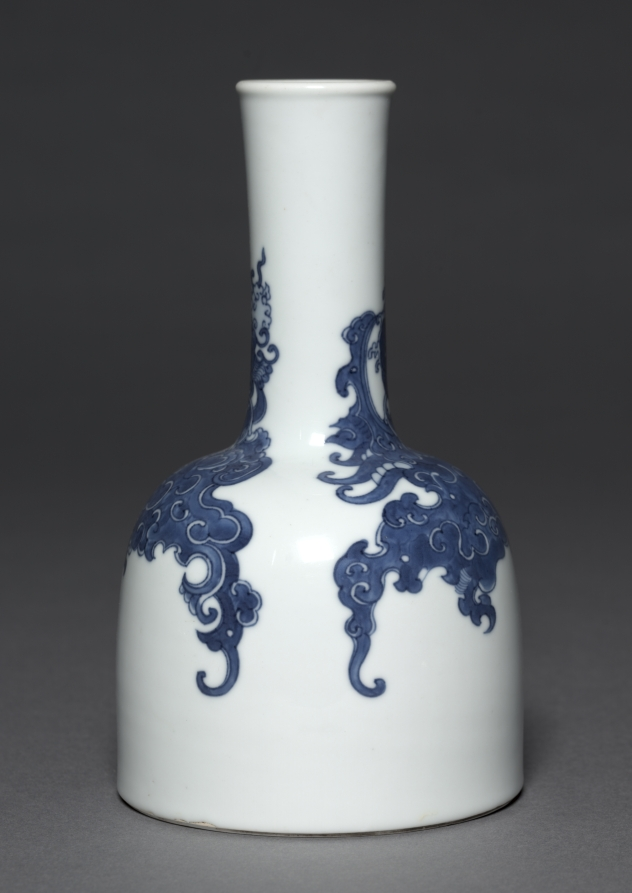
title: Mallet-Shaped Bottle with Phoenixes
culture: China, Jiangxi province, Jingdezhen, Qing dynasty (1644-1911), Kangxi mark and period (1662-1722)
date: 1662–1722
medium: porcelain with underglaze blue decoration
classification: Ceramic